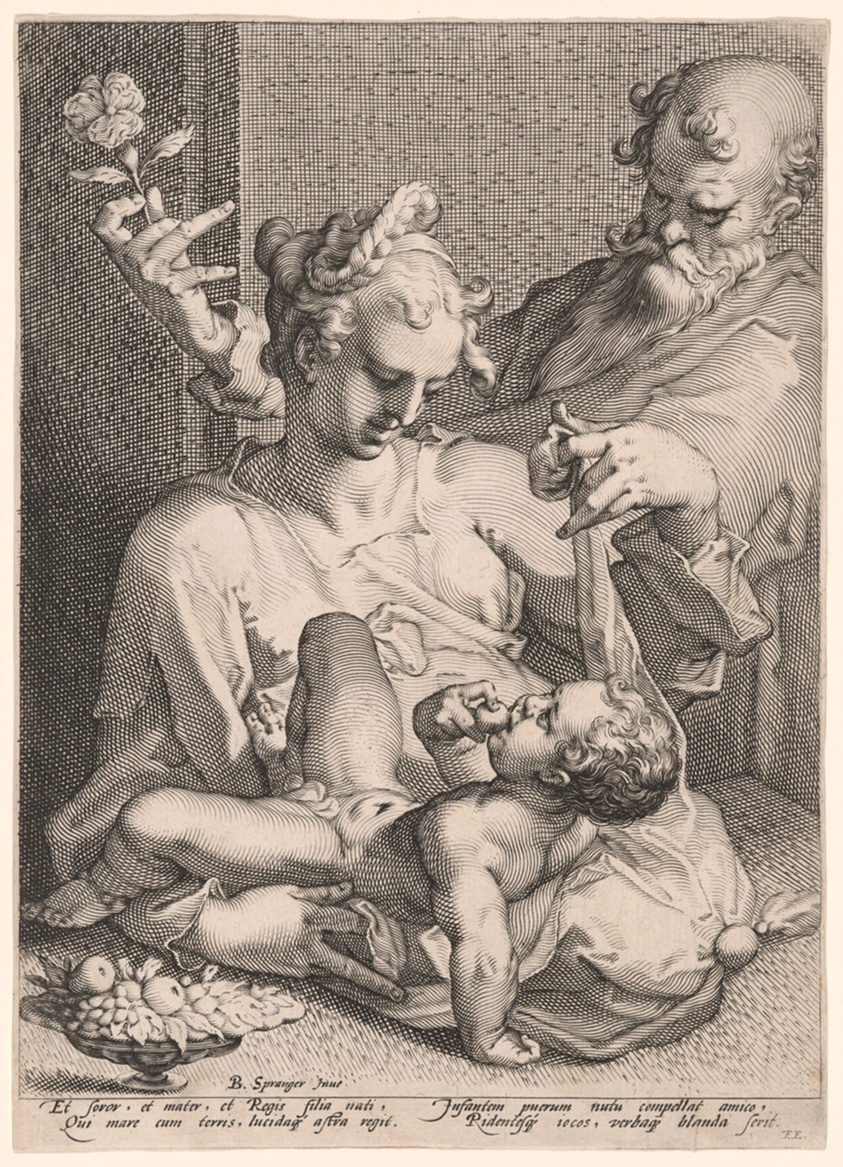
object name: Print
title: The Holy Family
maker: Attributed to Pieter de Jode I (Flemish, 1570–1634); after Bartholomeus Spranger (Flemish, 1546–1611)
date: c. 1585-1595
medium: Engraving on laid paper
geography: Flanders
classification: engraving; paper; print; prints and drawing